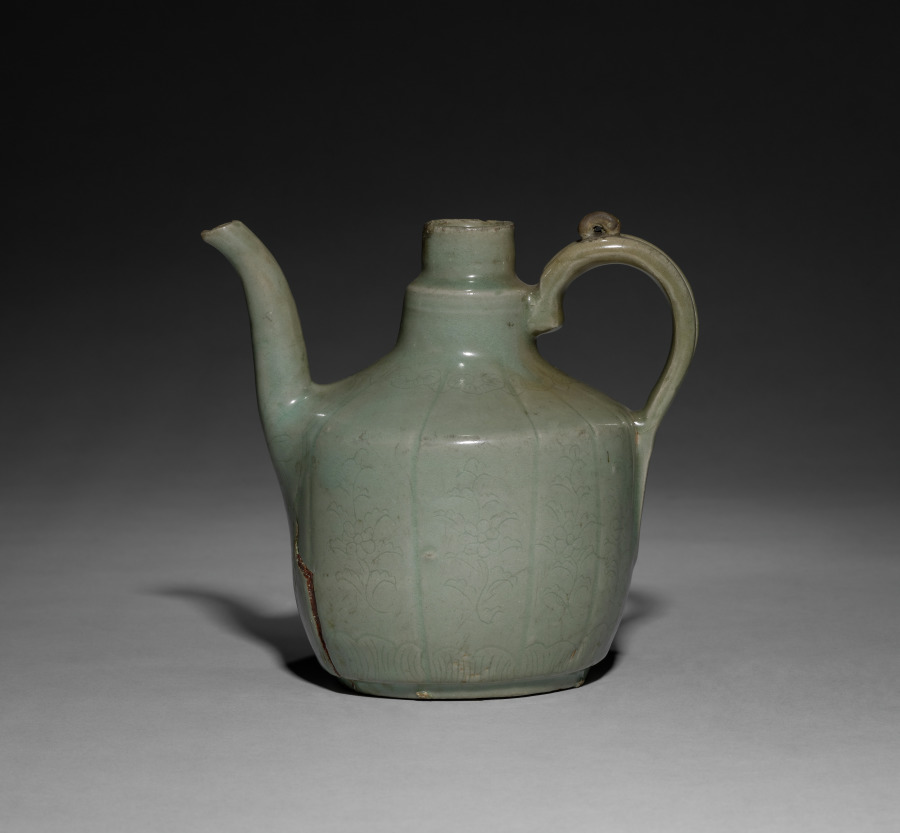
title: Wine Pot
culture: Korea, Goryeo dynasty (918–1392)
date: 918–1392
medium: pottery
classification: Ceramic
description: As early as the seventh century, the practice of drinking tea and wine became an important part of elite culture in Korea. Elites of the Goryeo period commissioned a variety of types of utensils and vessels including this elegant wine pot, not only to make their drinking experience more exciting, but also to show their appreciation of nature.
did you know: A chain or cord once connected a small loop on the handle and the lid to serve beverages without spilling.